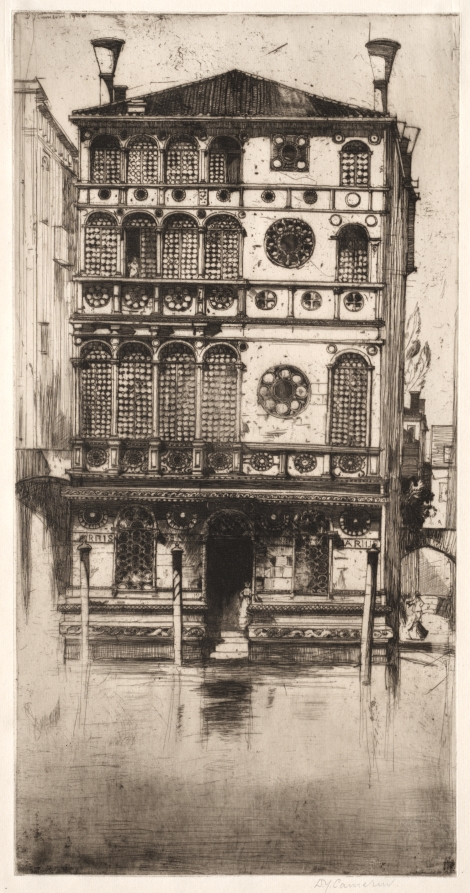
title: Palazzo Dario, Venice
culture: England, early 20th Century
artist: David Young Cameron (British, 1865–1945)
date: 1900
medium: etching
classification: Print